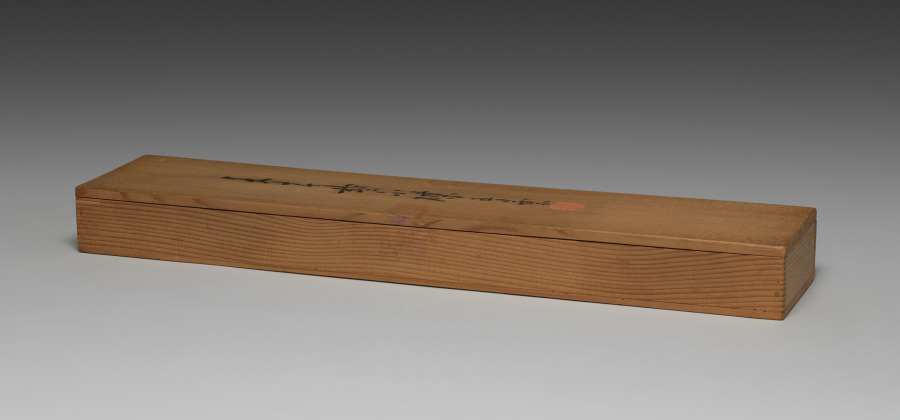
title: Maple Leaf-Shaped Saucers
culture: Japan, Meiji period (1868–1912)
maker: Seifū Yohei III (Japanese, 1851–1914)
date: 1893–1914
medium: Set of five saucers; porcelain with molded design and blue glaze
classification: Ceramic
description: These maple leaf–shaped saucers, like Yohei III's 5 shell saucers CMA 2022.188, have a long, horizontal box with a separate compartment for each piece. Now a set of 5, these dishes were originally a set of 10, stored in two boxes of 5 each. From their housings, which accommodate differing numbers of objects, one can hypothesize that while some items created by the Seifu studio were intended to be acquired in larger sets, and thus were perhaps made to order, others, like these, may have been items to be purchased off the shelf in set quantities that allowed clients flexibility in scale. The box for thesev5 saucers describes them as “heavenly blue[–glazed] porcelain” (tenseiji). The veins of the leaves are slightly raised in the clay so that the glaze pools around them and they stand out as white where the glaze thins. There are longer lines at the points of the leaves and shorter ones following the wall of each indentation so that the design has both a horizontal and a subtle vertical dimension. Each saucer has a round foot.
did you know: These saucers shaped like maple leaves show Seifū Yohei III’s “heavenly blue glaze.”